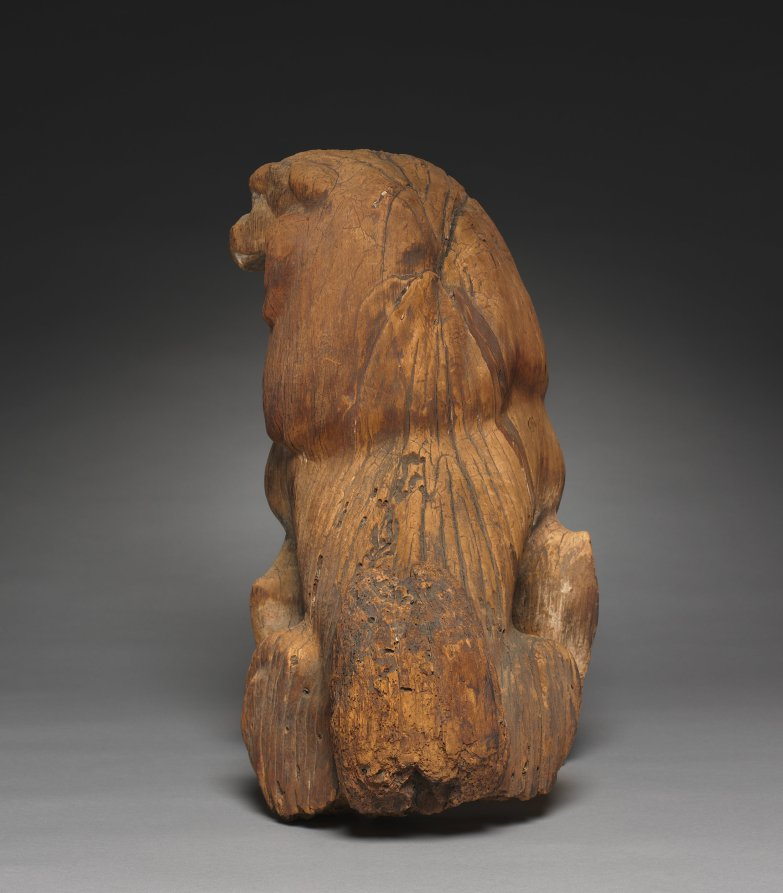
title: Guardian Animal: Karashishi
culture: Japan, Kamakura period (1185–1333)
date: 1300s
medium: Wood with traces of color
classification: Sculpture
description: Placed at the entrance to shrines and temples in Japan, guardian figures ward off evil spirits. These guardians used to be painted red and white and are distinguishable by their facial expressions: the open-mouthed animal is a karashishi, or “Chinese lion,” while the close-mouthed beast, which once had a single horn protruding from its head, is called a komainu, or “Korean dog.” The mouths correspond to infinity, the syllables ah (open) and um (closed), or the alpha and omega. This pairing was widespread in ancient times in Chinese territories and likely found its way to Japan via kingdoms in Korea.